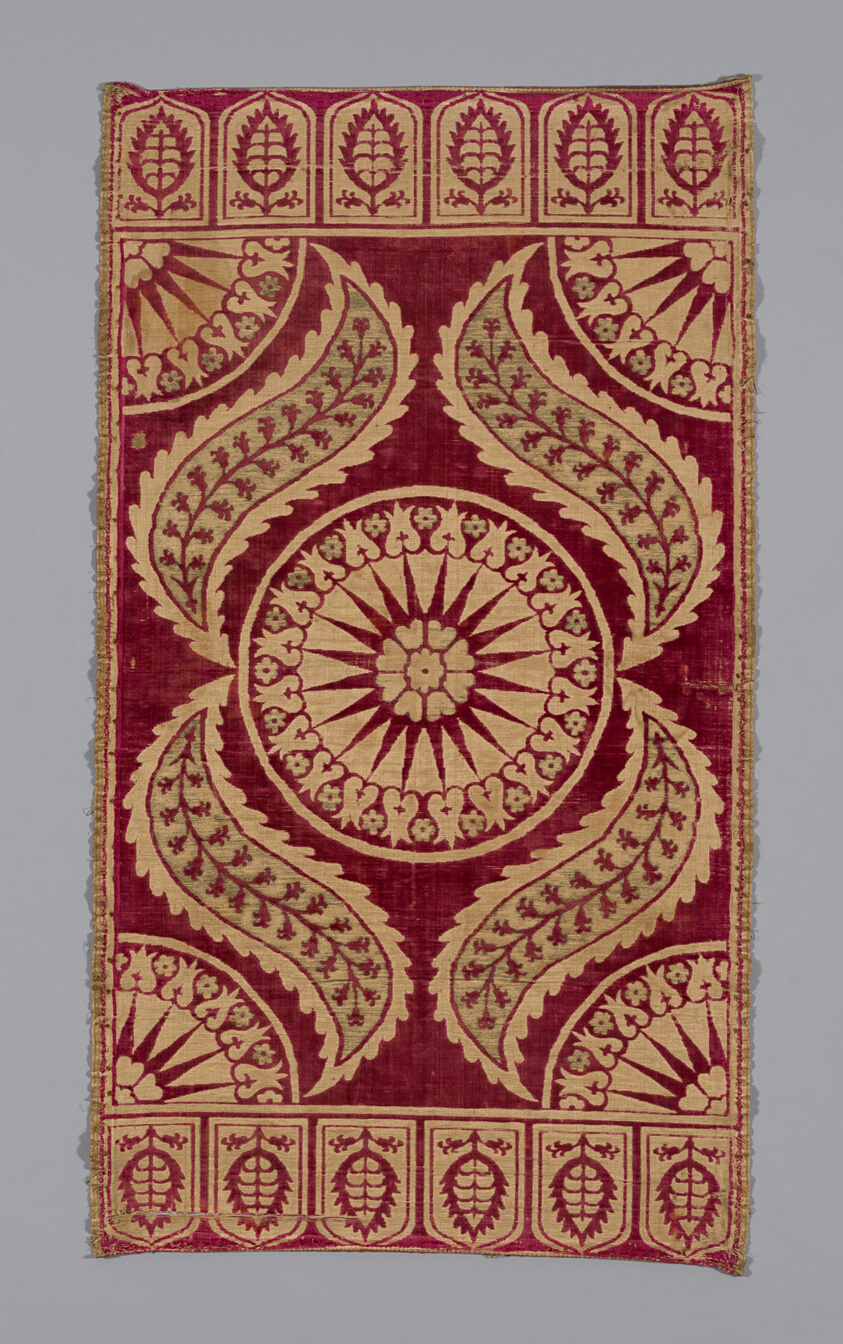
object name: Textile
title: Cushion Cover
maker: Turkey, Bursa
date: 17th century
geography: Turkey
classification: textile; weaving - velvet